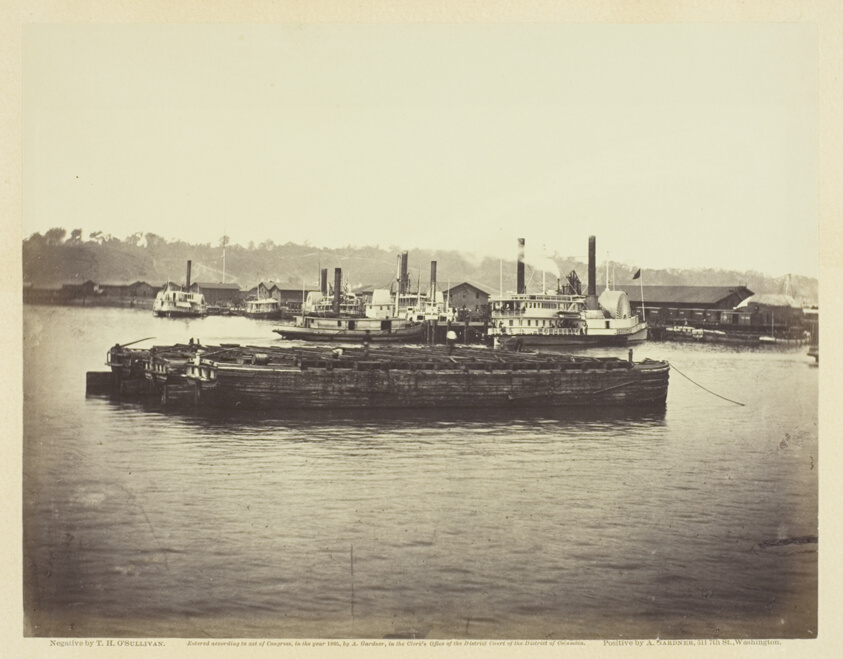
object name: Photograph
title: Evacuation of Aquia Creek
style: 19th century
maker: Timothy O'Sullivan (American, born Ireland, 1840–1882)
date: June 1863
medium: Albumen print, pl. 33 from the album "Gardner's Photographic Sketch Book of the War, vol. 1" (1866)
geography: United States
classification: photograph; albumen silver print; photography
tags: Collected by Hugh Edwards, Gardner's Photographic Sketch Book